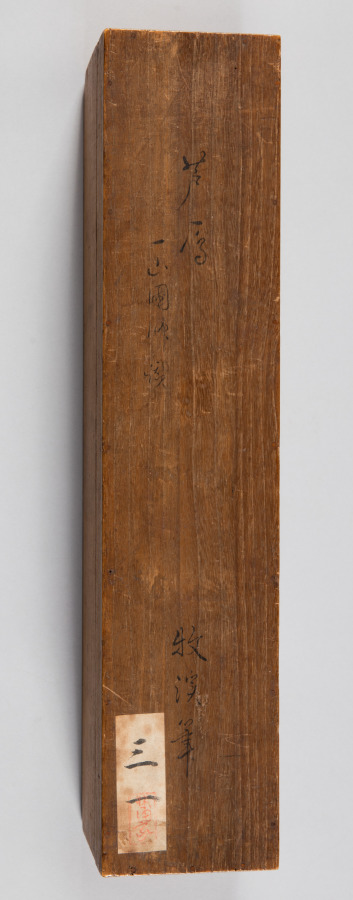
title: Reeds and Geese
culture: Japan, Kamakura period (1185–1333)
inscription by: Yishan Yining [Issan Ichinei] (Chinese, 1247–1317)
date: 1314–17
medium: hanging scroll; ink on paper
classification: Painting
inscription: signed: Issan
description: Reeds and geese has been a common pairing in Chinese literary and visual culture for many centuries. This painting presents the contribution of a Japanese amateur painter, almost certainly a Zen Buddhist monk, to Japan’s fledgling efforts to add the theme to its own cultural vocabulary in the early 1300s. As was customary at the time in Japan, the painter did not sign or seal his work; the inscription, a poem added to the painting by the eminent émigré monk Yishan Yining, along with his signature and seal, was of far greater cultural value. Today, the modestly sized painting has tremendous significance as one of the earliest surviving examples of Japanese ink paintings with reeds and geese.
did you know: Tokyo National Museum owns a copy of this painting made by Kano Gyokusen (1796–1864) when he was 14 years old.